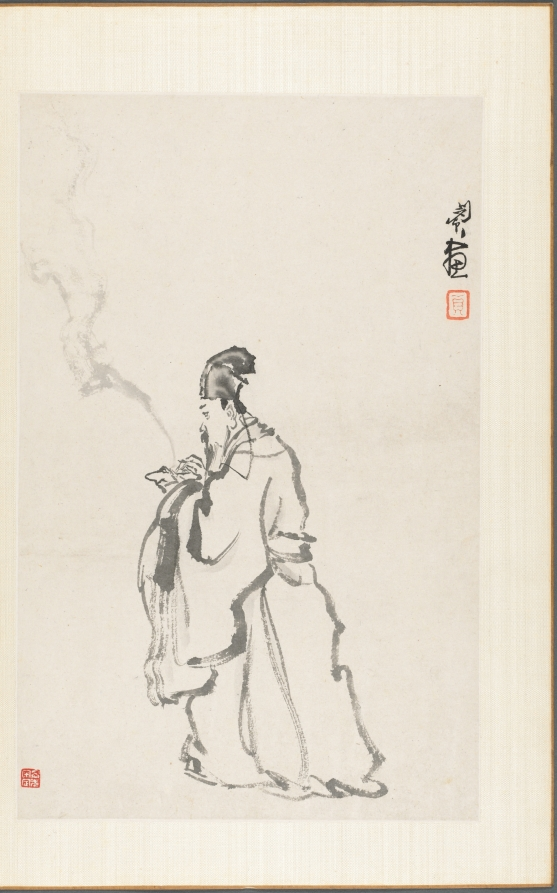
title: Su Dongpo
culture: China, Qing dynasty (1644-1911)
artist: Min Zhen (Chinese, 1730–after 1788)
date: 1788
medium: album leaf, ink on paper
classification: Painting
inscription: Inscription by Min Chen on the last leaf: I have a habit of collecting strange rocks. My friend Tai-li shan-jen* treasures my paintings as much as I treasure strange rocks. Once we agreed to exchange what we love with each other. However, my busy activities have kept me from carrying this out. This summer I realized that this strange rock has been sitting in my studio for five years, so I painted this to fulfill my old promise. As a record, I chose the grotesque cliff in the last scene of this twelve-leaf album. Cheng-chai, Min Chen inscribed this on the sixth day of the sixth month [July 9] of the wu-shen year [1788]. * Tai-li shan-jen is Wang Li [tzu: Li-fu] tr. Hou-mei Ishida Six seals appearing on the leaves: Min Chen, Cheng-chai, Ching-ch'iao, Chen, Liao-t'ang, Min Chen chih-yin.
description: Min Zhen, who was orphaned at age 12 and developed an eccentric personality, was trained by Tang Yin (1682–1756), a writer, playwright, and superintendent of the imperial porcelain workshops in Jingdezhen. The connection to him may have enabled Min to stay in Beijing for a decade from around 1773. It is not clear whether he ever resided in Yangzhou, but his style is in many instances reminiscent of that of Yangzhou artist Huang Shen. This album demonstrates Min’s versatility and mature style in the last years of his life.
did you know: Su Dongpo 蘇東坡 (1037–1101) is the likely model, but the gentleman is holding an incense burner instead of an ink stone more commonly associated with the famed poet.